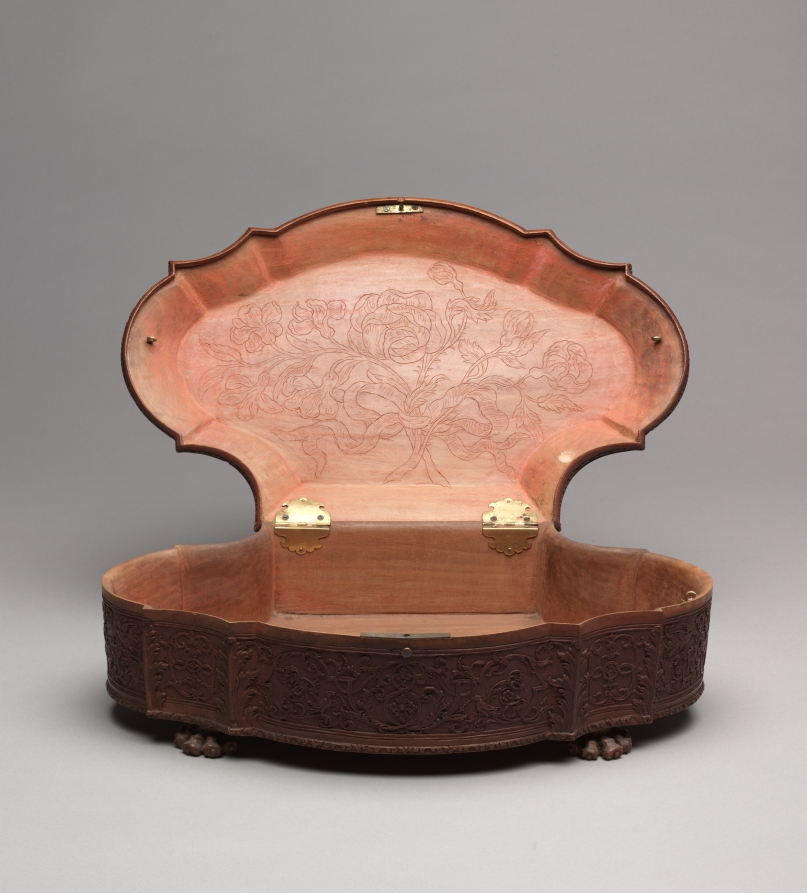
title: Box (2 of 2)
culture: France, Nancy, early 18th century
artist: Bagard (French)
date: early 1700s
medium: wood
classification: Furniture and woodwork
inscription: on top of lid, initials crowned by coronet